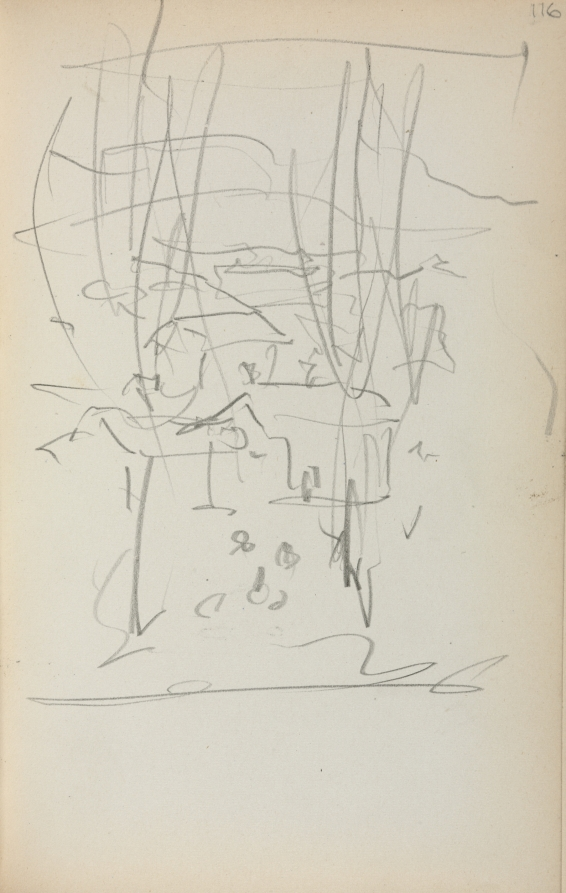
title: Italian Sketchbook: Landscape (page 116)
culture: America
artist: Maurice Prendergast (American, born Newfoundland [now Canada], 1858–1924)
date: 1898–1899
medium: pencil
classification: Bound Volume